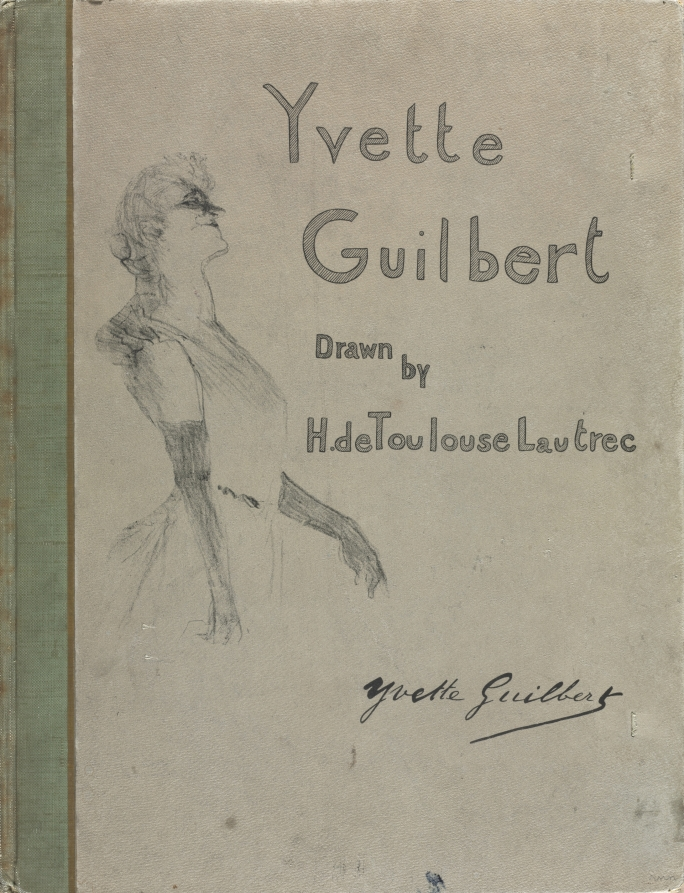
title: Yvette Guilbert-English Series: Cover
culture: France, 19th century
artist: Henri de Toulouse-Lautrec (French, 1864–1901)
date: 1898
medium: lithograph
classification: Bound Volume